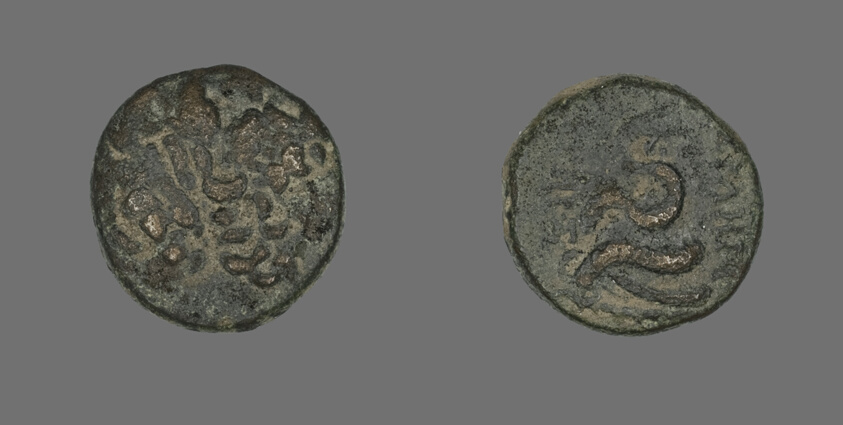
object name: Coin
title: Coin Depicting the God Asklepios (?)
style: late hellenistic, hellenistic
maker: Greek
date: probably Late Hellenistic Period, about 200/133 BCE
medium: Bronze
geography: Ancient Greece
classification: coin; ancient art